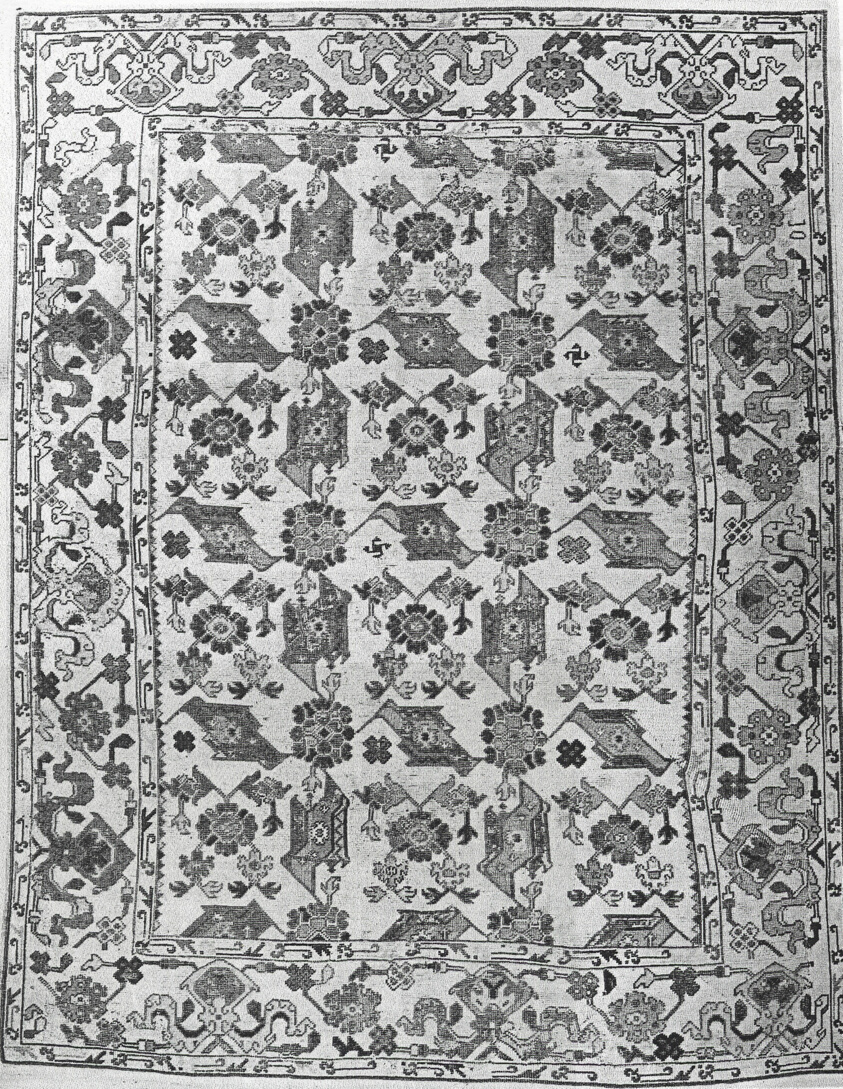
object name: Textile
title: Imitation "Bird" Carpet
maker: Romania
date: 1901/25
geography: Romania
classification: textile; weaving - carpet; weaving